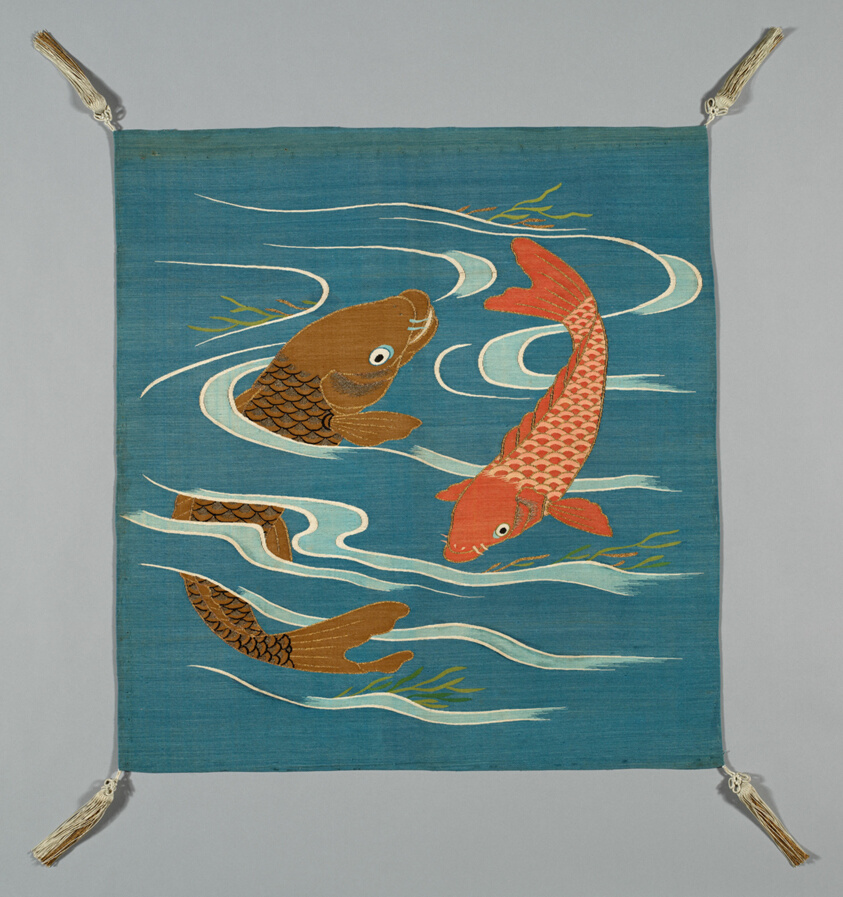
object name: Textile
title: Fukusa (Gift Cover)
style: late edo, meiji, edo (japanese period), Japanism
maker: Japan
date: late Edo period (1789–1868)/ Meiji period (1868–1912), 19th century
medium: Pattern side: silk and gold-leaf-over-lacquered-paper-strip-wrapped cotton, slit tapestry weave (tsuzure); corners: silk and gold-leaf-over-lacquered-paper-strip-wrapped cotton, tubular 1:1 oblique interlacing over cotton core, knotted; silk-wrapped cotton ball and re-plied silk, gold-leaf-over-lacquered-paper-strip-wrapped cotton fringe tassels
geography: Japan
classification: textile; weaving; needlework (visual works)